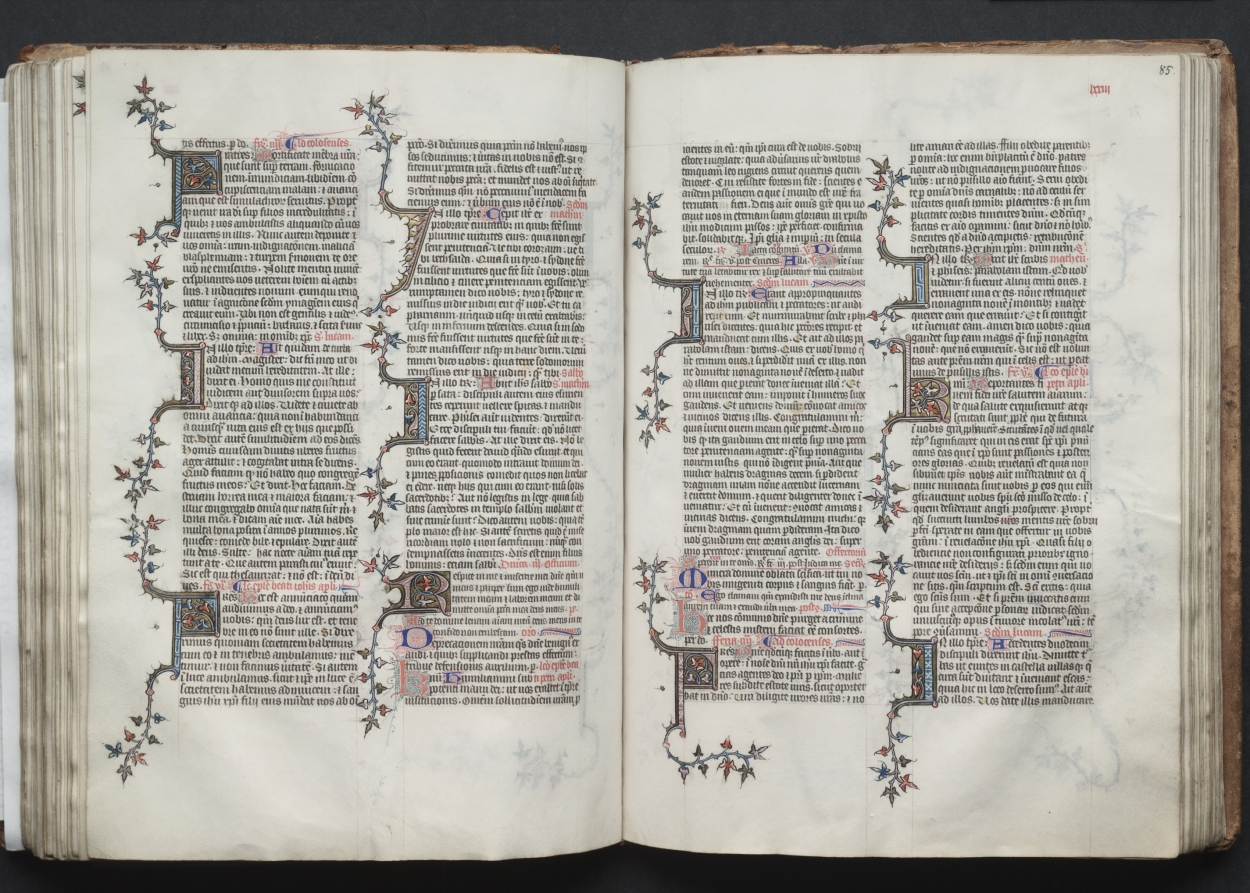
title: The Gotha Missal: Fol. 85r, Text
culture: France, Paris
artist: Master of the Boqueteaux (French)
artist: and Workshop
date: c. 1375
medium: ink, tempera, and gold on vellum; blind-tooled leather binding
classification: Bound Volume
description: The style and quality of this manuscript's decoration is typical of deluxe Parisian books made for aristocratic or royal patrons. Most of the book's decoration appears to be the work of the Master of the Boqueteaux, an artist active at the court of King Charles V (died 1380). His style was apparently shared by a number of book illuminators working in and around Paris. It is very possible that the Gotha Missal belonged to Charles V, but is not provable because the manuscript has no royal portraits and lacks a colophon. Given the book's magnificent decoration, however, it would seem that it was produced for a Valois prince, if not for the king himself. The manuscript receives its name from the German dukes of Gotha, its later owners.